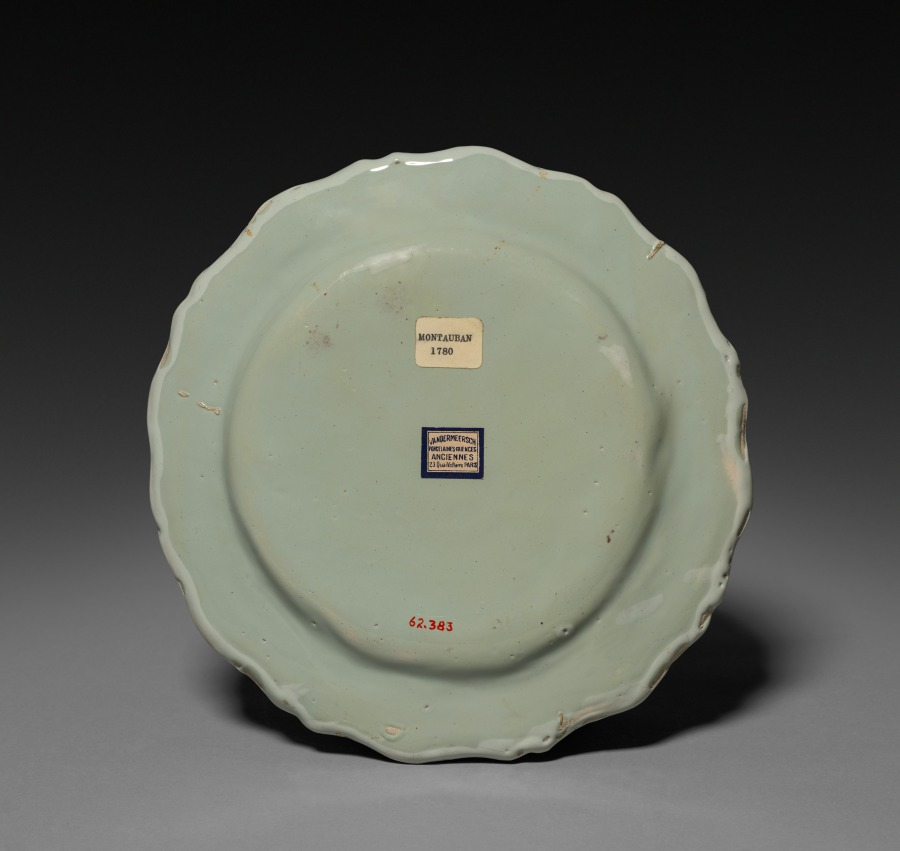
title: Plate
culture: France, Montauban(?), 18th century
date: c. 1780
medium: faience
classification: Ceramic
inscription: inscribed with French poen in the center.